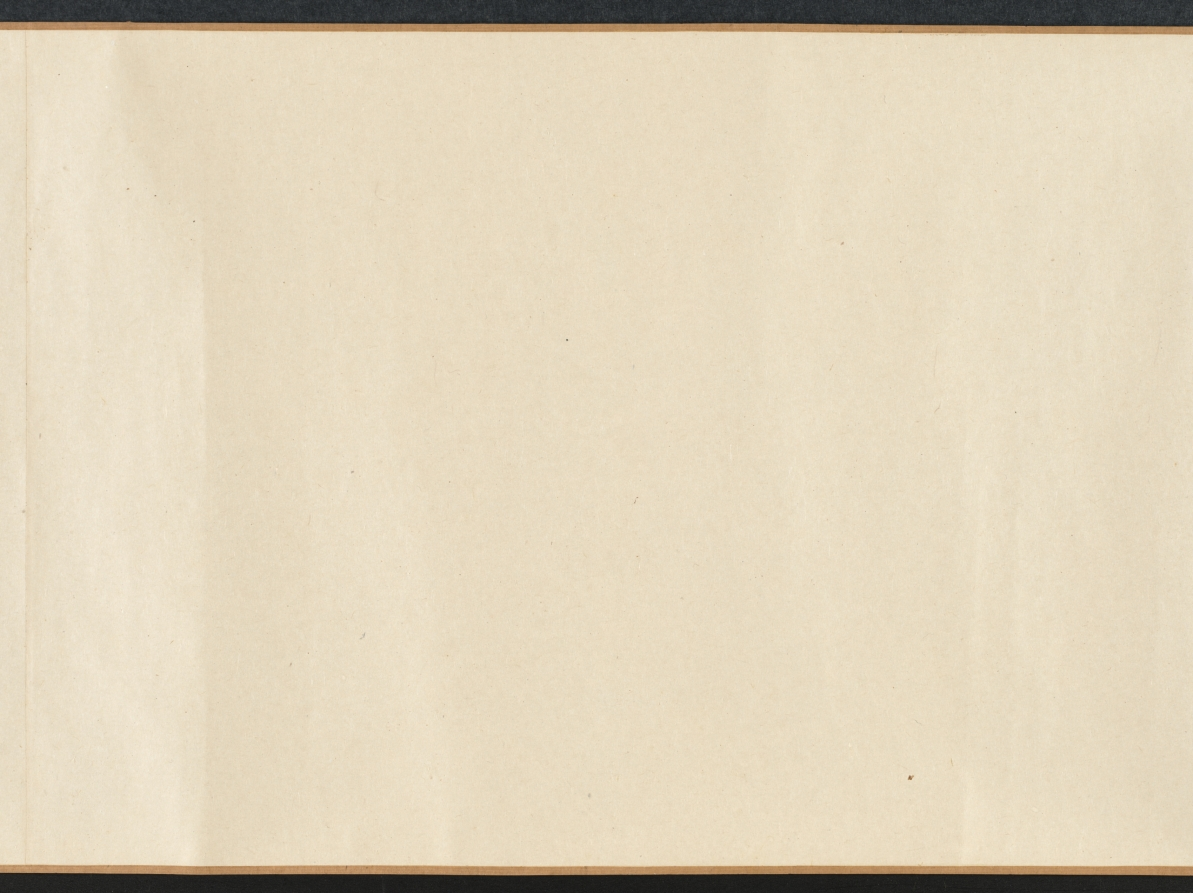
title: Landscape with Bamboo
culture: China, Yuan dynasty (1271-1368)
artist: Song Ke (Chinese, 1327–1387)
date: 1300s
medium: Handscroll; ink on paper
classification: Painting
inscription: 東吳宋克戲為仲幾畏友圖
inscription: 2 colophons and 14 additional seals: 1 seal of Yü Chung-chi (14th c.); 1 seal of Wu Ch'eng (1469 jinshi); 1 colophon and 2 seals of Wu K'uan (1435–1504); 1 colophon and 9 seals of Cheng Qi (1911–1988); 1 seal unidentified.